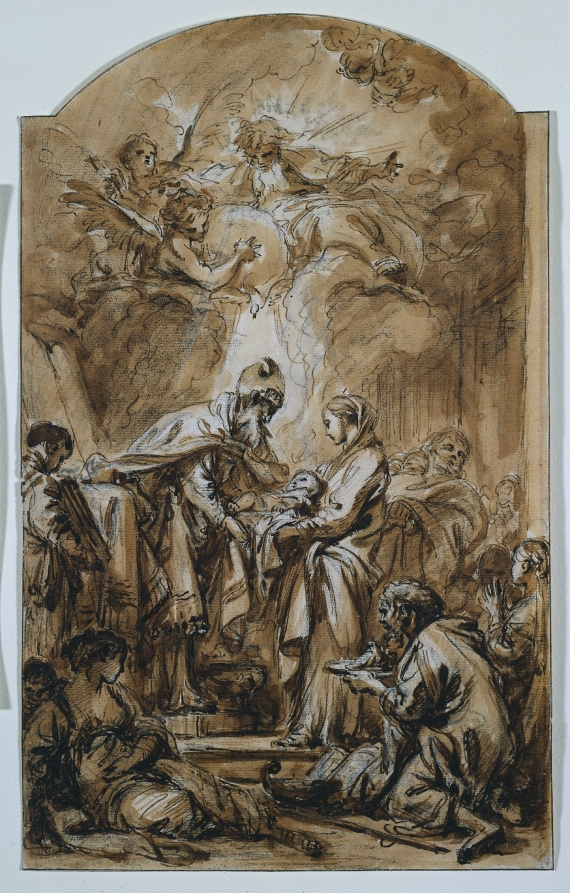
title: The Presentation in the Temple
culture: France, 18th century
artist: François Boucher (French, 1703–1770)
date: c. 1770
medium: pen and brown ink, brush and brown wash, and black chalk, heightened with white paint; framing lines in pen and brown ink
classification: Drawing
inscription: verso, center, in graphite: G; lower left, in graphite: Lest R./-oc-.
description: Late in his career, François Boucher adopted a drawing style characterized by strong pen lines and loosely brushed washes. This sheet, which dates from that period, depicts the blind priest Simeon, at left, who was promised that he would see the Messiah before his death. When the Christ child was brought into the temple near him, Simeon regained his sight. Boucher emphasized the miraculous event by showing divine light streaming down onto the priest from the dove above, which represents the Holy Spirit. The drawing is similar to an oil sketch (Louvre, Paris) that Boucher completed during the last year of his life -- one of the very last projects he ever completed.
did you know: This drawing was probably a sketch for an oil painting that Boucher was unable to complete before his death.